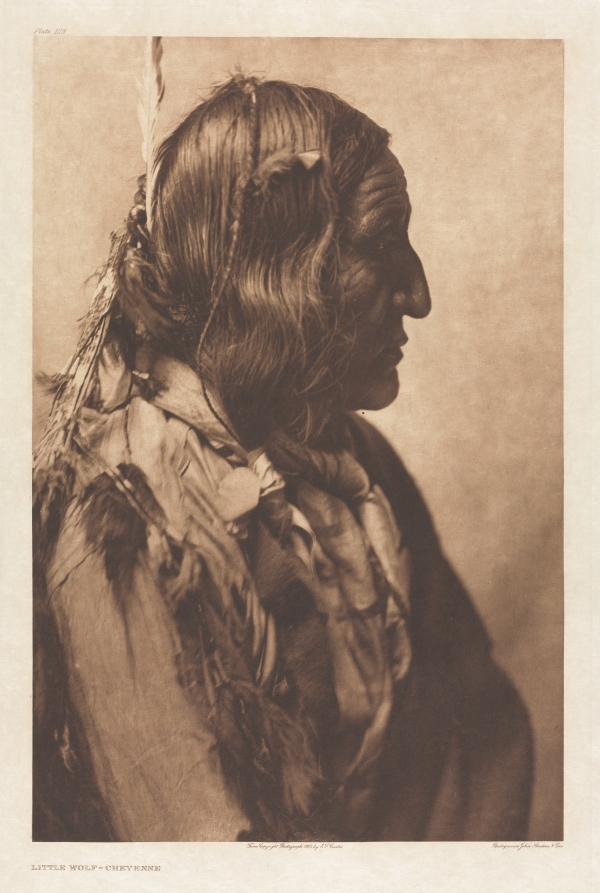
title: Portfolio VI, Plate 219: Little Wolf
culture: America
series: The North American Indian: being a series of Portfolios picturing and describing the Indians of the United States, the Dominion of Canada, and Alaska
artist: Edward S. Curtis (American, 1868–1952)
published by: The University Press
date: 1905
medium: photogravure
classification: Portfolio